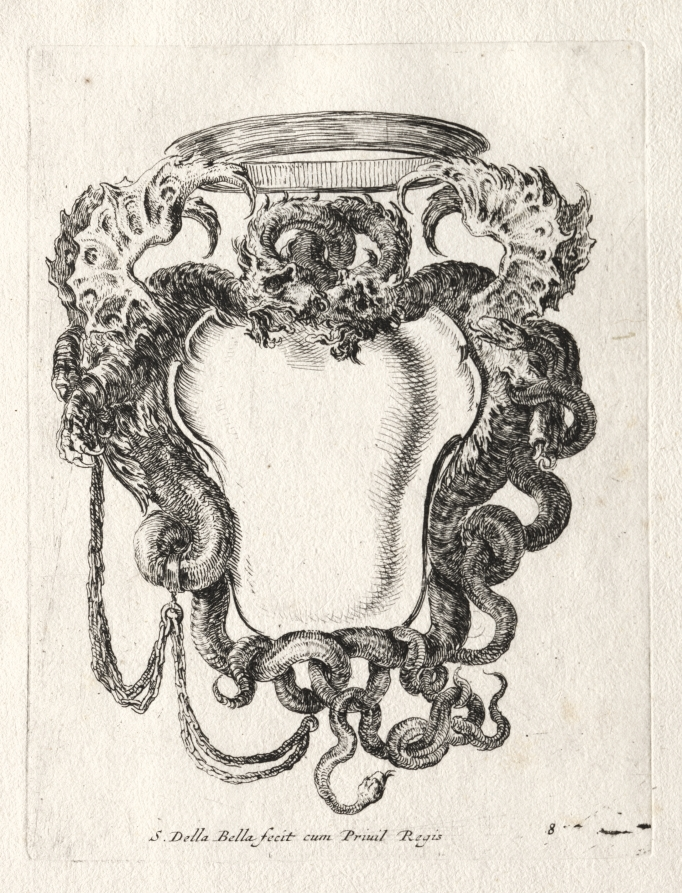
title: New Model for a Cartouche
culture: Italy, 17th century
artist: Stefano Della Bella (Italian, 1610–1664)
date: 1647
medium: etching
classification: Print